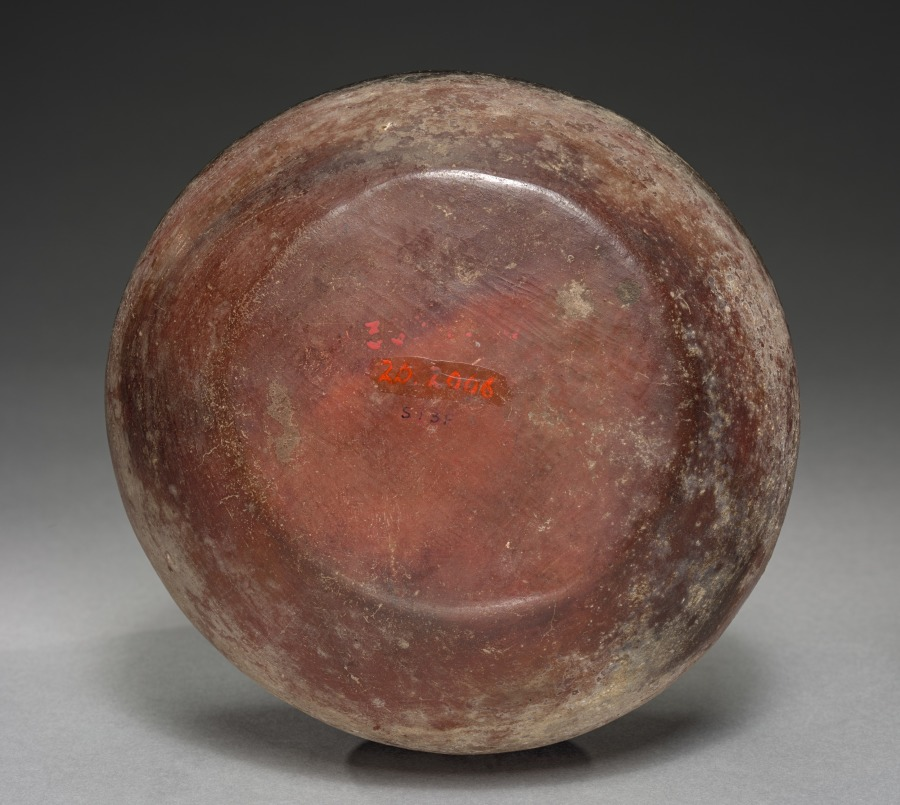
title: Black-Topped Bowl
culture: Egypt, Predynastic (5000–2950 BCE), Naqada II (3650–3300 BCE)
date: 4000–3000 BCE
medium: Nile silt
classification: Vessels